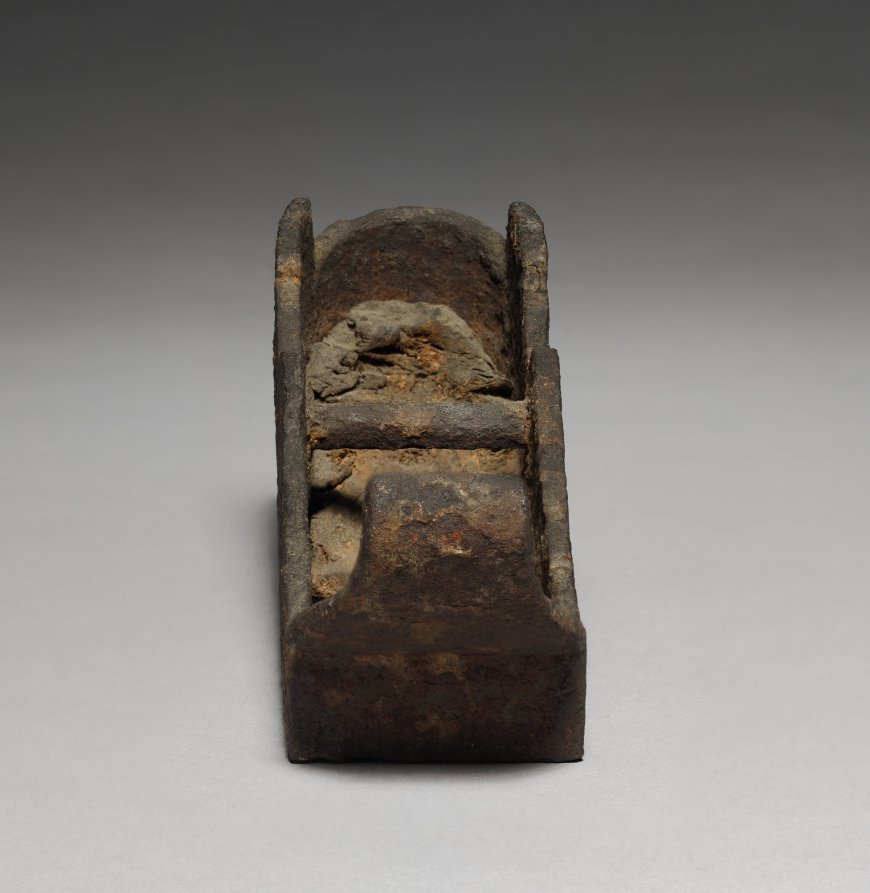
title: Carpenter's Plane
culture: Italy, 15th century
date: 1400s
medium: wood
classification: Tool